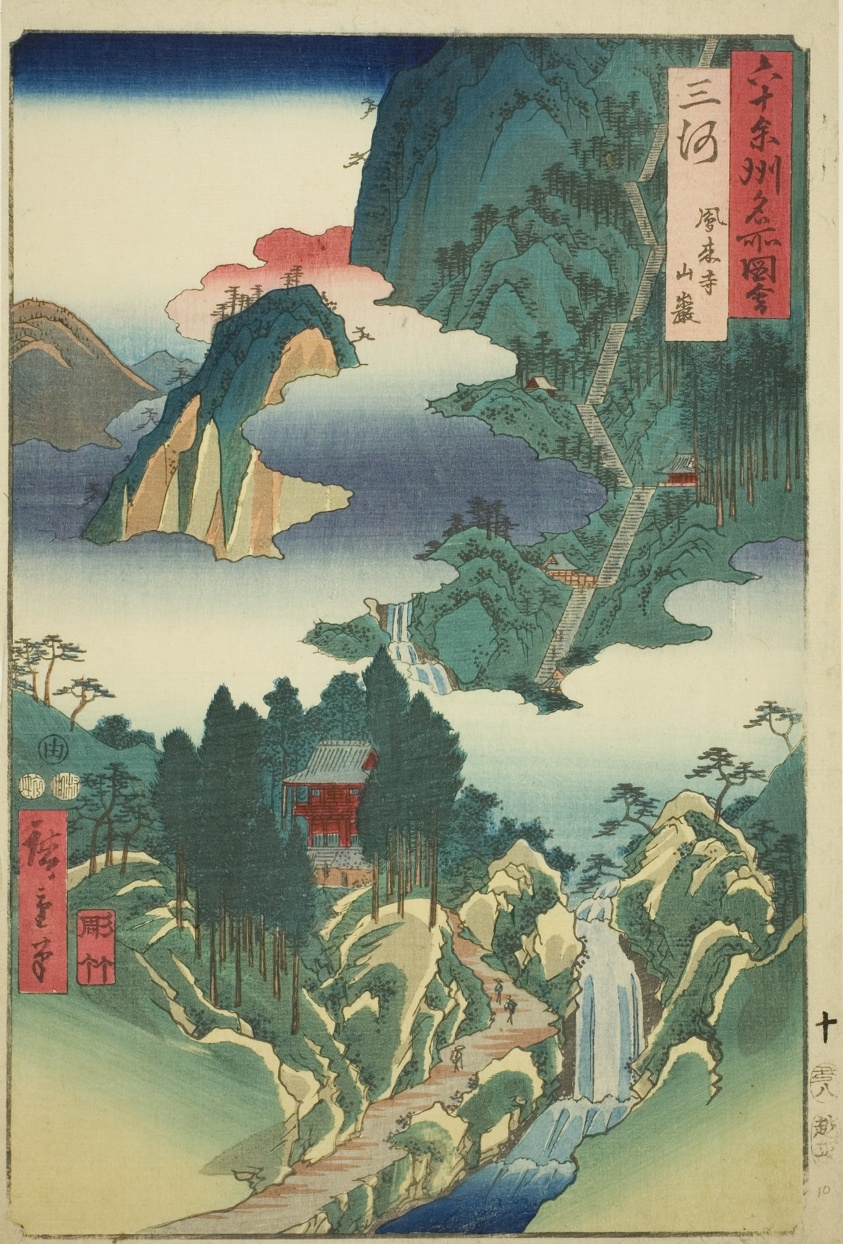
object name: Print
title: Mikawa Province: Horai Temple in the Mountains (Mikawa, Horaiji sangan), from the series "Famous Places in the Sixty-odd Provinces (Rokujuyoshu meisho zue)"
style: Japanese (culture or style)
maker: Utagawa Hiroshige 歌川 広重; Japanese, 1797-1858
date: 1853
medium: Color woodblock print; oban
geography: Japan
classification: woodblock print; print; asian art